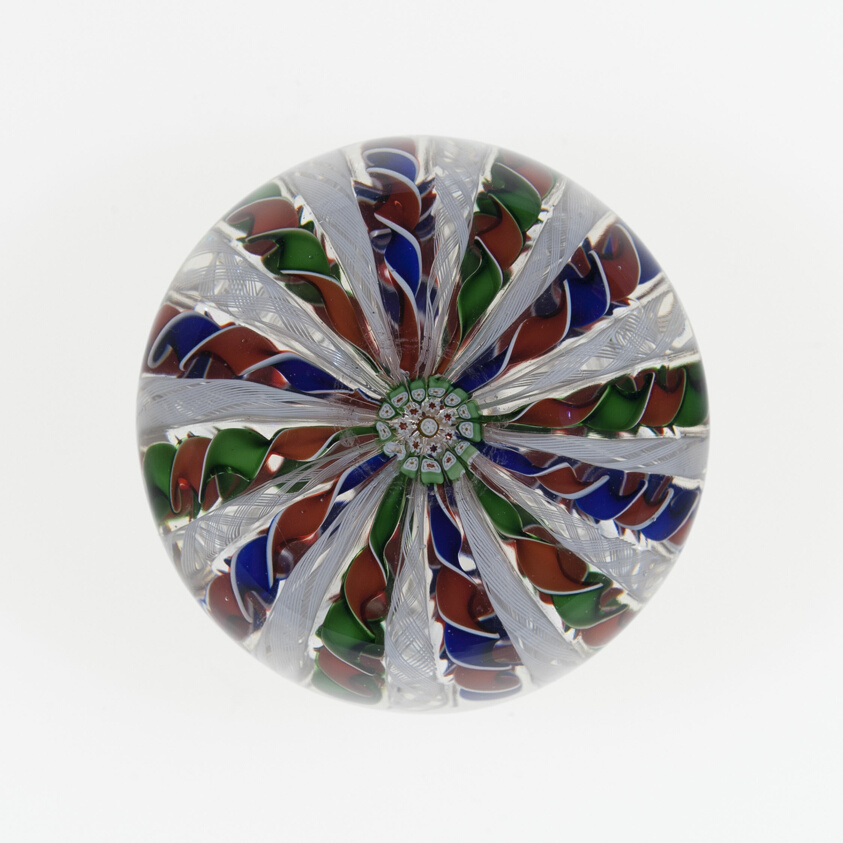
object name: Glass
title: Paperweight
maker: Saint-Louis Glassworks (Cristalleries de Saint-Louis); Lorraine, France, founded 1586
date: c. 1845–60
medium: Glass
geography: Saint-Louis-lès-Bitche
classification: paperweight; glass